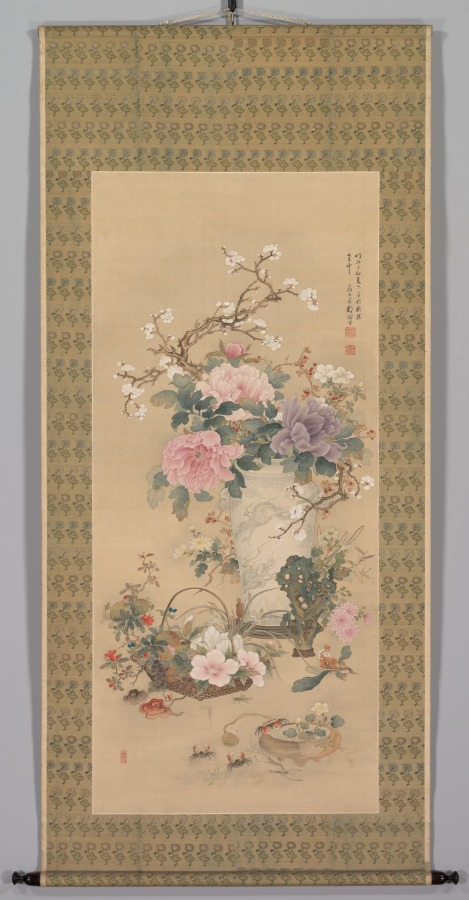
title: Vase of Flowers with Grasshopper, Marine Life, and Garden Rock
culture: Japan, Meiji period (1868–1912)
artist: Okabe Ko (Japanese)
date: late 1800s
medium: hanging scroll; ink and color on silk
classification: Painting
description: A great interest in Western scientific studies developed in Japan during the late Edo period (1615-1868) and into the Meiji era (1868-1912). One outcome of this phenomenon in the visual arts was the detailed portrayal of plant, animal, and marine life. This painting is an assemblage of objects carefully observed from nature, but not usually seen together.